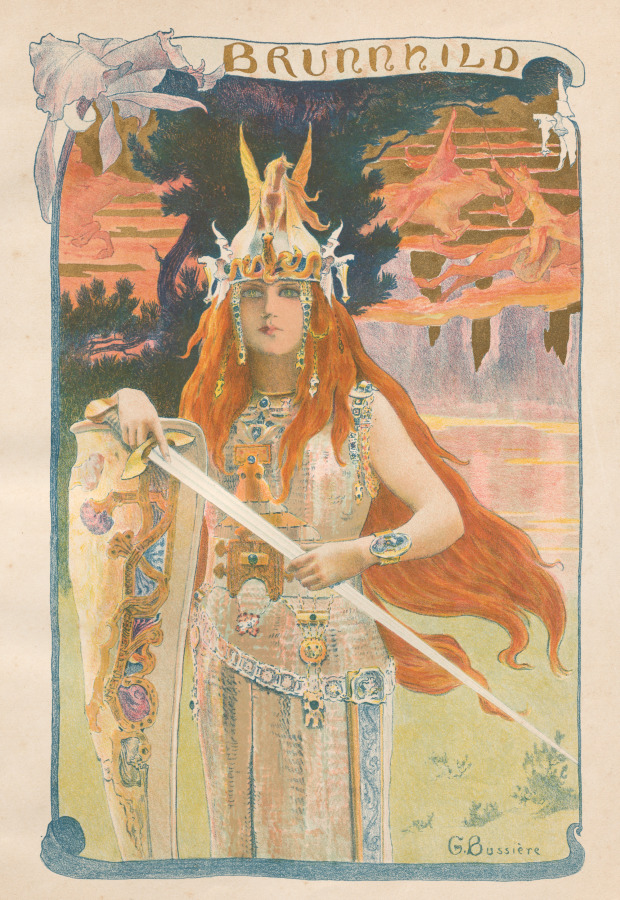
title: Brunnhild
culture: France, Paris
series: L'Estampe Moderne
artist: Gaston Bussiere (French, 1862–1929)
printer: Imprimerie Champenois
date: 1899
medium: Color lithograph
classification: Bound Volume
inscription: In plate:lower right corner of image: G. Bussière; lower right corner of sheet: blindstamp of l'Estampe Moderne (Lugt 2790)